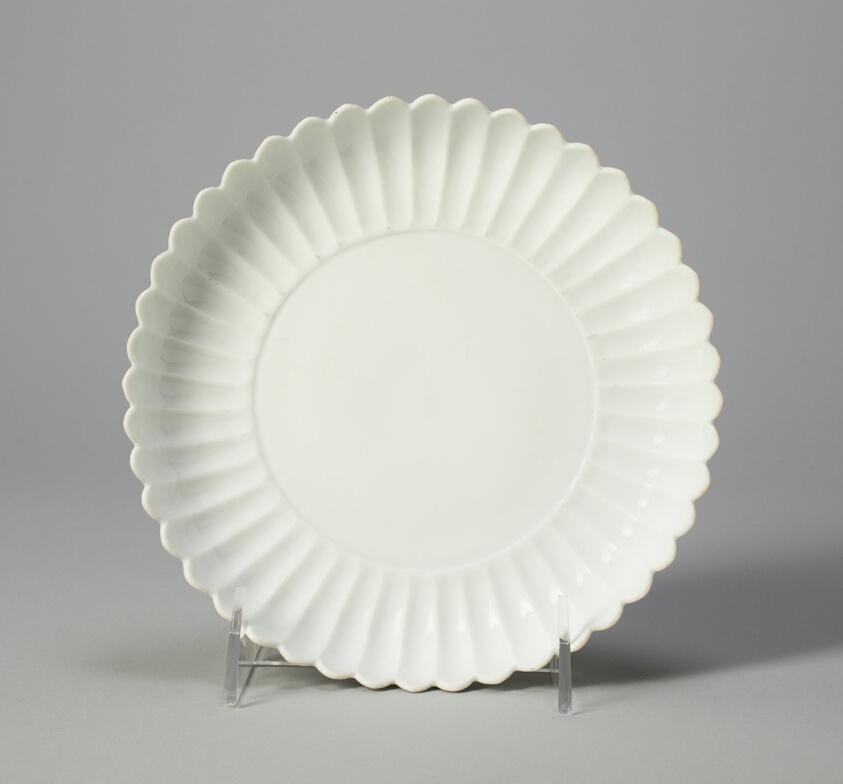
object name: Vessel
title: Chrysanthemum Dish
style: Chinese (culture or style)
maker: China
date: Qing dynasty (1644–1911), Yongzheng reign mark and period (1723–35)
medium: Glazed porcelain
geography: China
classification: dish (vessel); porcelain; asian art; ceramics; vessel